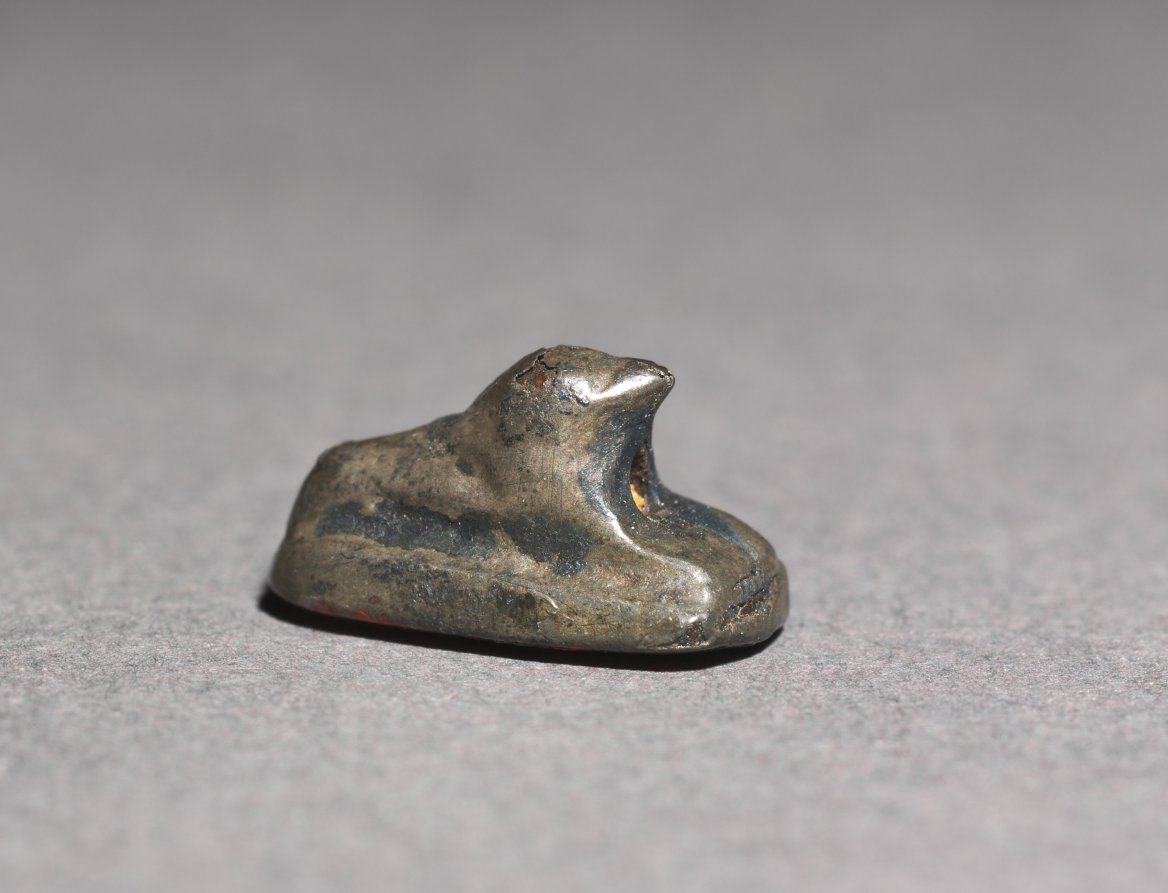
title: Recumbent Lion Bead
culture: Egypt, Middle Kingdom (2040–1648 BCE), Dynasty 12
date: 1980–1801 BCE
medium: silver foil over a clay-bulked resin core (?)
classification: Amulets